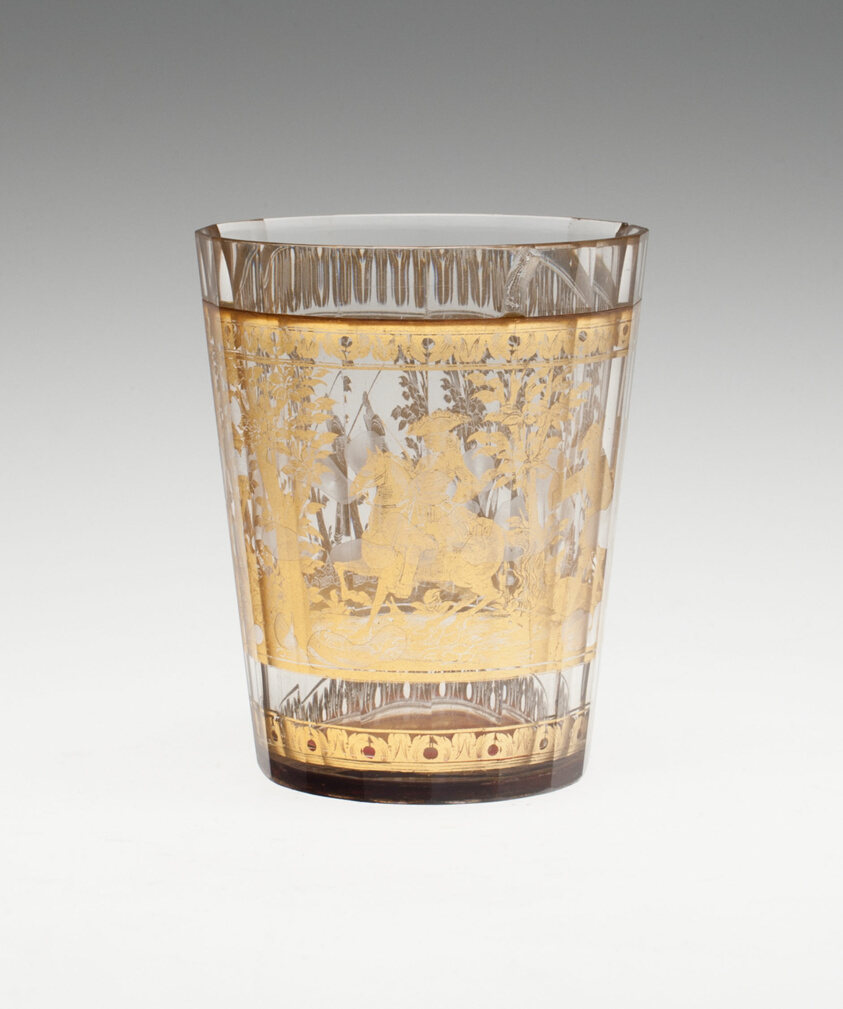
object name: Glass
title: Beaker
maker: Bohemia, Czech Republic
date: c. 1730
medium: Glass with engraved gold leaf decoration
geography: Bohemia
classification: drinking vessel; glass; european decorative arts